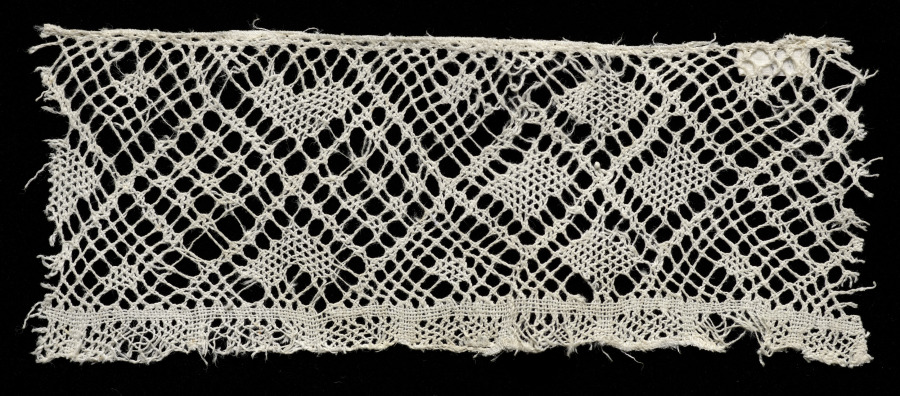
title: Lace Edging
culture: Spain, Seville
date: 1600s–1700s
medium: Bobbin lace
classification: Lace